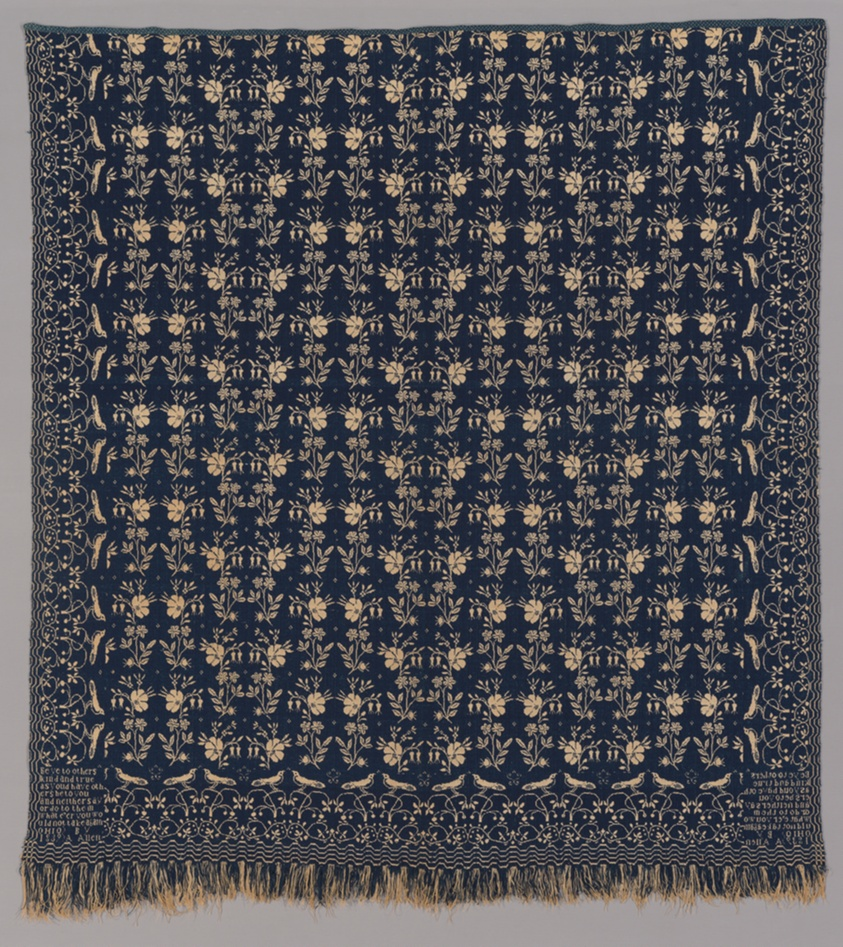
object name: Textile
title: Coverlet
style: 19th century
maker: Abram Allen (American, born Irish, c. 1796- after 1860); United States, Ohio, Clinton County, Wilmington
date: 1839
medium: Cotton and wool, plain weave double cloth with main warp fringe; woven on loom with Jacquard attachment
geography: Ohio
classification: textile; coverlet; weaving - coverlet; weaving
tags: flowers, words, vines, primrose, fruit, friendship, foliage, birds, bird, coverlet